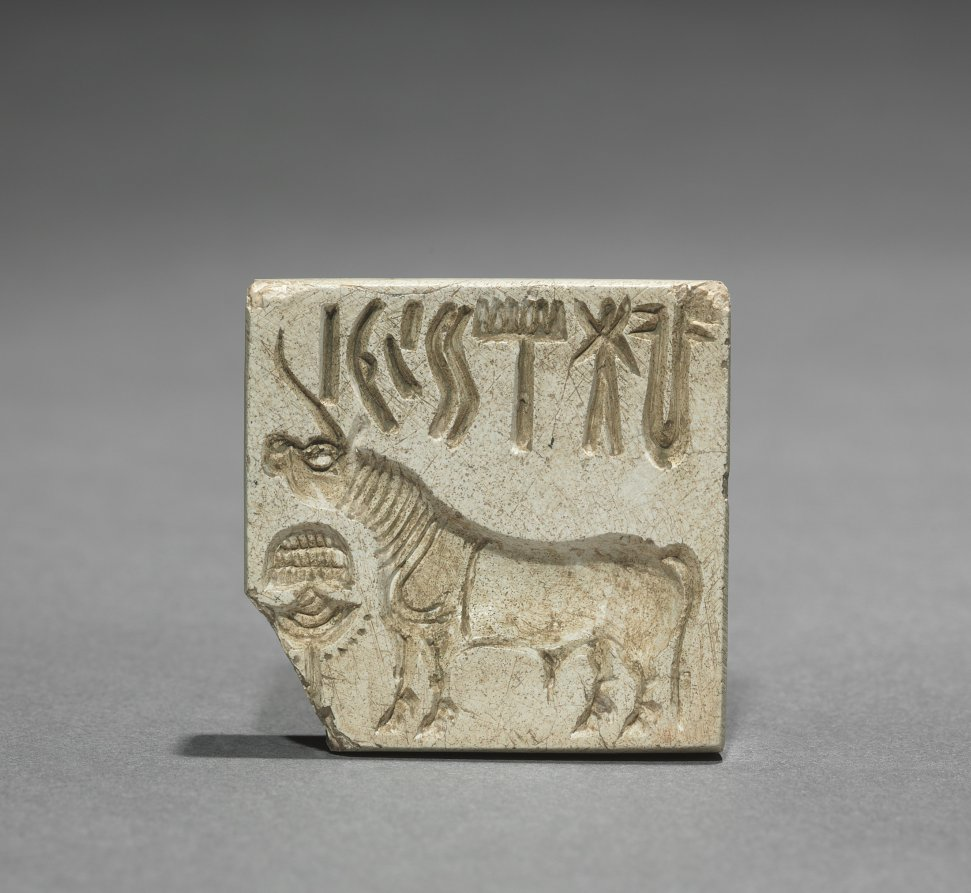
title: Seal with Unicorn and Inscription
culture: Pakistan, Indus Valley civilization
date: c. 2000 BCE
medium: steatite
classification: Seals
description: Indus Valley seals appear to have been hung on a string that passed through a boss on the reverse side. This animal, carved with detailed markings around his neck and forequarters, has his head positioned over an object on a stand that may be interpreted as an altar or brazier or censer; it is not known whether it is for offerings to or sacrifice of the animal.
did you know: Specialists disagree as to whether single-horned bovines actually lived during the time of the Indus Valley Civilization, four thousand years ago.